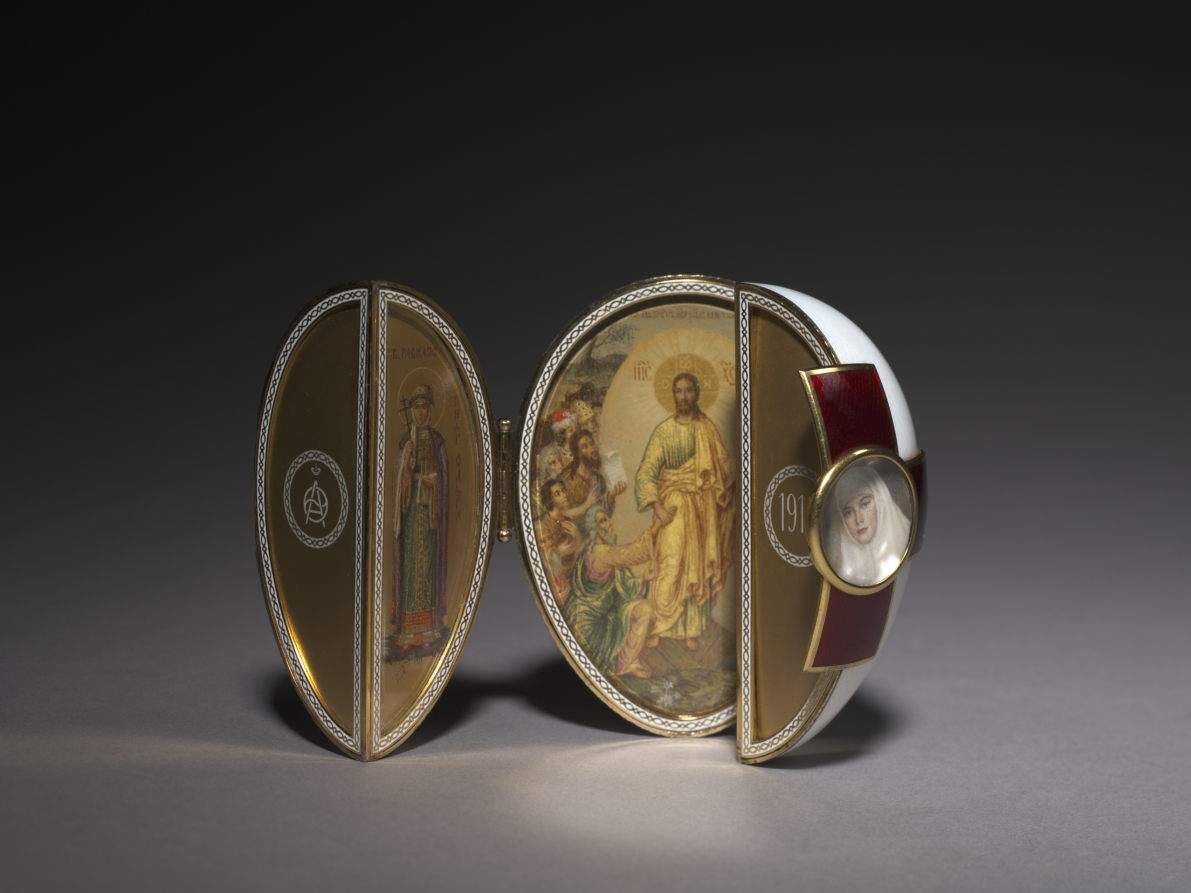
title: Imperial Red Cross Easter Egg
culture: Russia, St. Petersburg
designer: Peter Carl Fabergé (Russian, 1846–1920)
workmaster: Henrik Wigström (Russian, 1862–1923)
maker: House of Fabergé (Russian, 1842–1918)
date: 1915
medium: gold, silver gilt, enamel, glass, ivory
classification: Miscellaneous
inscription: inscribed on interior of egg: symbols for Alpha and Omega and imperial crown for Alexandra Feodorovna; 1915; inscriptions in Cyrillic, Old Church Slavonic, and Roman letters which identify Sts. Olga and Tatiana and presumably describe the central scene of the triptych.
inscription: Inscribed on silk velvet and satin lined case: double-headed eagle, Fabergé, Petersburg, Moscow, London (all in Cyrillic on lining of case); 17.559, abbreviation for "Red Cross" (in Cyrillic in red ink on outside of case).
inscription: Hallmarks: 72, Kokoshnik, lower case alpha in script [assay mark of St. Petersburg, 1908-26]; H.W. [initials of workmaster Henrik Wigström]; Fabergé (in Cyrillic).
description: The House of Fabergé made two imperial Easter eggs in 1915 that honored the contributions of Tsarina Alexandra and her two eldest daughters, Olga and Tatiana, to the war effort as Red Cross Sisters of Mercy. Compared to other Fabergé eggs elaborately ornamented with jewels, the eggs reflected the mood of austerity in Russia during World War I. This version becomes an icon when opened, revealing miniatures of the patron saints of the tsarina’s daughters. After the Russian Revolution, this relic of the Tsarist past was sold by the Soviet government to raise needed cash for the treasury.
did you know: This egg was confiscated by the Bolsheviks during the Russian Revolution and sold by the government of Josef Stalin in the 1930s to raise money for the Soviet treasury.